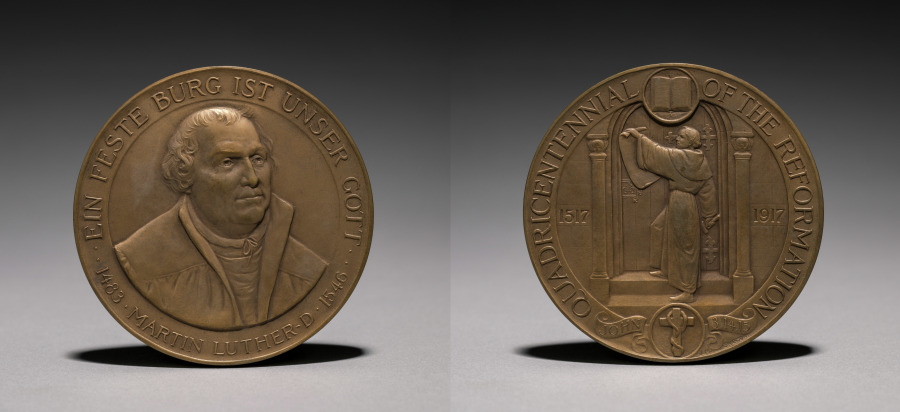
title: Medal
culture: America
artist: Jonathan M. Swanson (American, 1888–1963)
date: 1917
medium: bronze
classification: Metalwork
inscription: first line of Luther's hymn, "Ein feste Burg ist Unser Gott. 1483. Martin Luther. D. 1546."